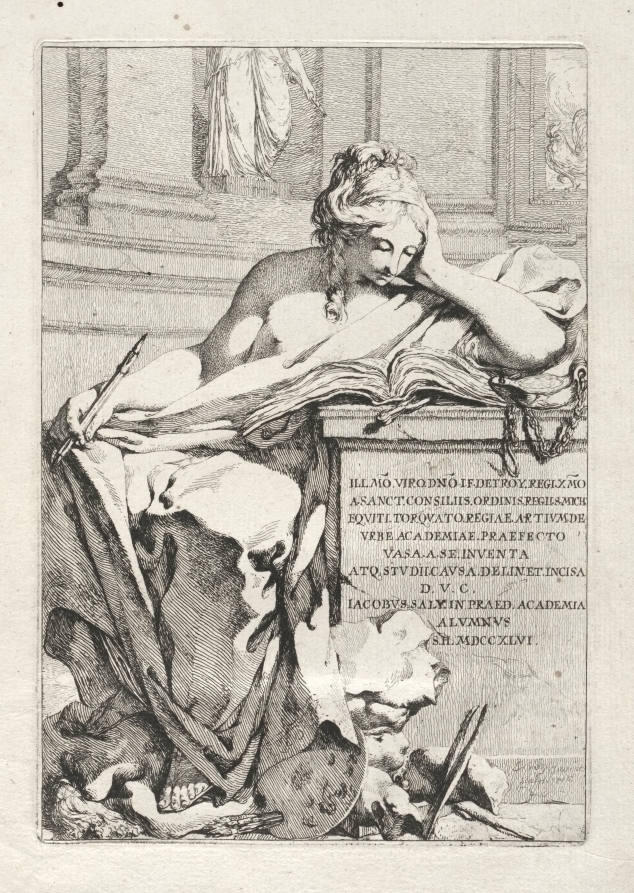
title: Suite of Vases: Title Page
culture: France, 18th century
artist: Jacques François Saly (French, 1717–1776)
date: 1746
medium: etching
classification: Print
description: Designing ornamental vases or urns was particularly popular during the mid-18th century since the only limit to the possibilities was the imagination of the artist. Saly, a sculptor by training, was a student at the French Academy in Rome from 1740 to 1746, at which time he published a set of 30 etchings. Saly began with basic antique vase forms but deviated from classical ornament to use a rich variety of fantastic creatures for embellishment.